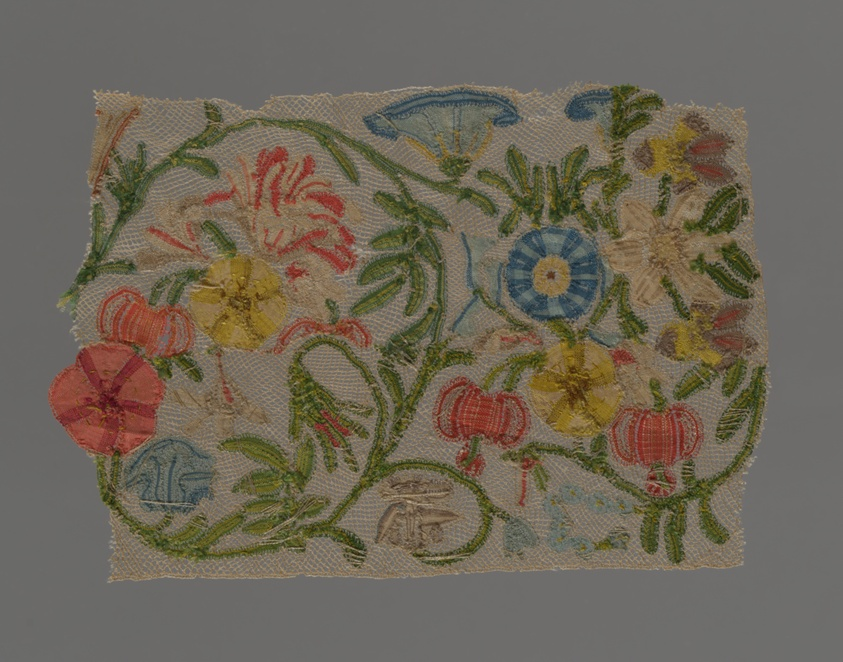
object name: Textile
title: Fragment (Border)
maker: Possibly produced by M. Jesurum & Cie. (Italian, 19th century); Italy, Venice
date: Late 19th century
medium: Silk, bobbin part lace; embroidered in single satin stitches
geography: Venice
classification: textile; lace - bobbin